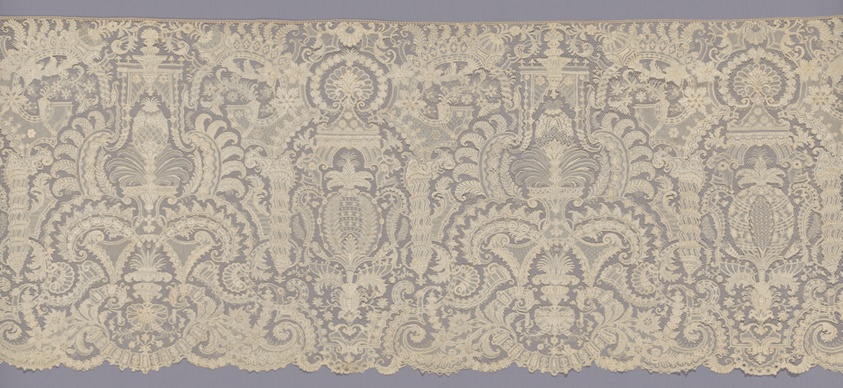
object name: Costume and Accessories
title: Flounce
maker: France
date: 1701/25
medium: Linen, needle lace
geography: France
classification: textile; lace - needle; costume component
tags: fashion, arabesque, cartouches, columns, pineapples